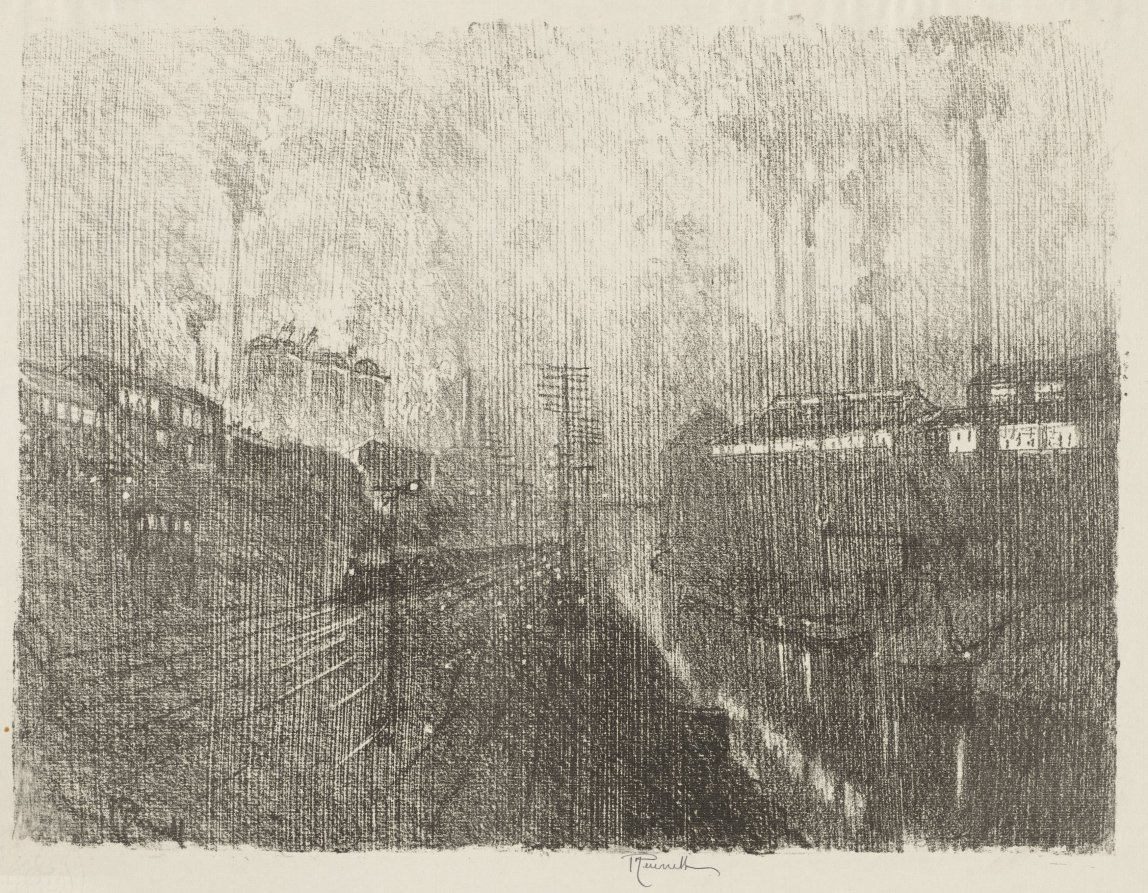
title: English War Work: Evening in the Munitions Country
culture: America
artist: Joseph Pennell (American, 1857–1926)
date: 1916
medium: lithograph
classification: Print